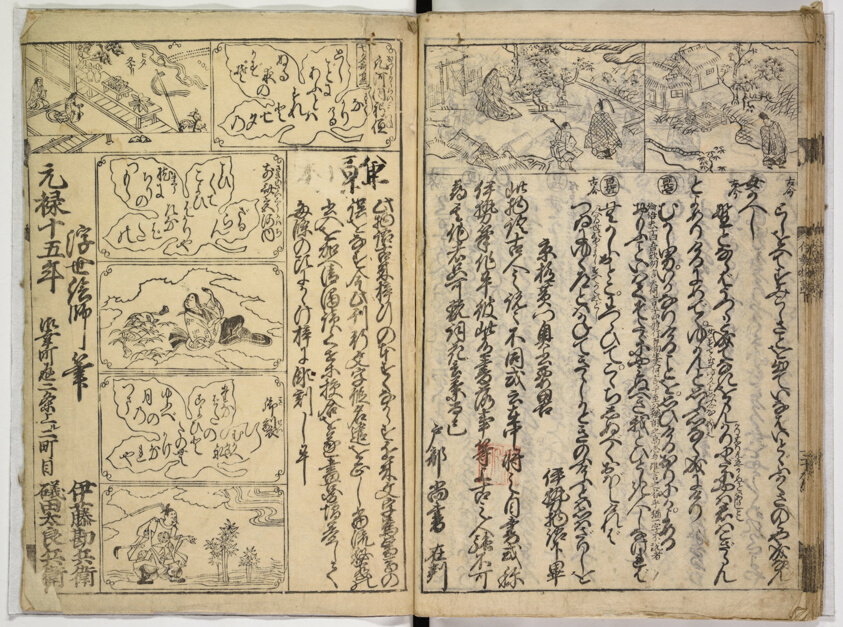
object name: Book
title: Tales of Ise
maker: Artist unknown, Japanese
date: 1702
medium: Woodblock-printed book; 2 vols.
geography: Japan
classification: book